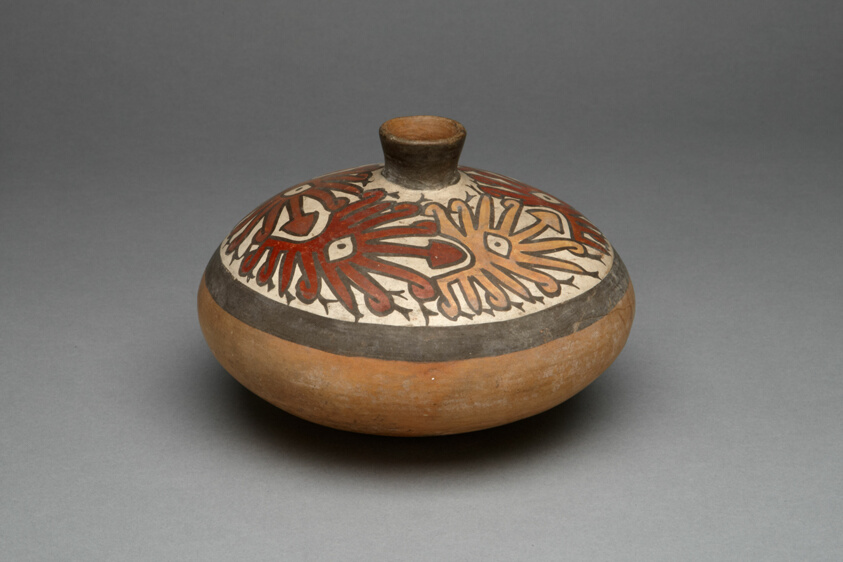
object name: Vessel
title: Low Jar with Small Spout Depicting a Repeated Abstract Star or Face Motif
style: nazca, early intermediate period, Pre-Columbian, americas, Arts of the Americas, andean, andes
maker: Nazca; South coast, Peru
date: 180 BCE–500 CE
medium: Ceramic and pigment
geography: Nazca Valley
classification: earthenware; art of the americas; ceramics; vessel